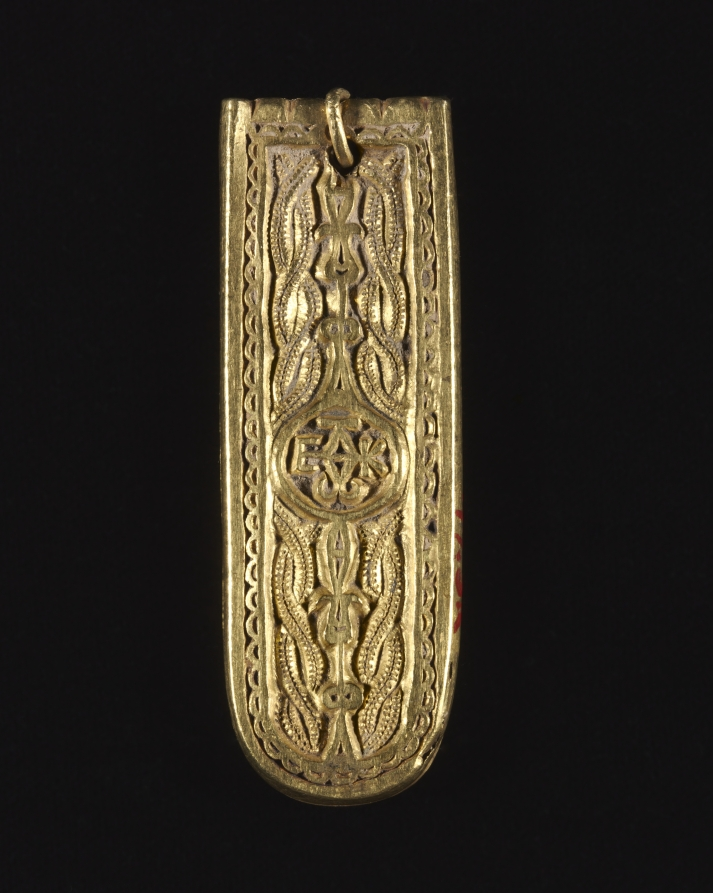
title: Tab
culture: Byzantium, Avaric, 7th century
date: 600s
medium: gold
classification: Metalwork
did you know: Although this entered the collection with a buckle, it was later determined that they did not originally belong together.